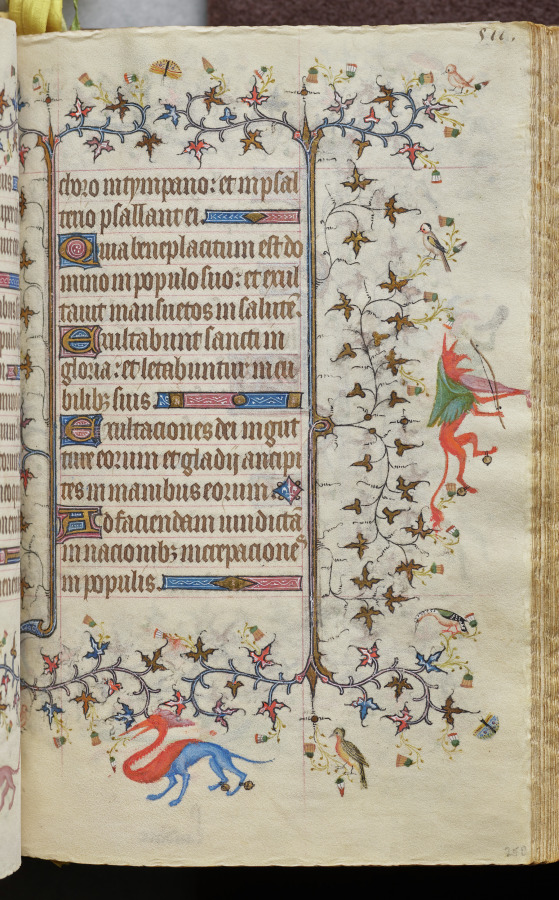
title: Hours of Charles the Noble, King of Navarre (1361-1425): fol. 250r, Text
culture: France, Paris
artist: Master of the Brussels Initials and Associates (French)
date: c. 1405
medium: ink, tempera, and gold on vellum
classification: Bound Volume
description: This precious volume was obviously highly prized by its owner, the French-born King of Navarre, who had his coat of arms painted on no less than twenty folios. Rather than directly commissioning this manuscript from a specific workshop, it seems that Charles the Noble acquired his book of hours -- perhaps ready-made for the luxury market -- while on a trip to Paris in 1404-05. A collaborative effort, six painting styles are evidenced within the pages of this codex, those of two Italians, two Frenchmen, and two Netherlanders. The painter who was responsible for the planning and decoration of the book, and who produced seventeen of the large miniatures, was a Bolognese artist known as the Master of the Brussels Initials. His principal assistant, responsible for most of the borders, was a Florentine who signed his name "Zecho" da Firenze on folio 208 verso.